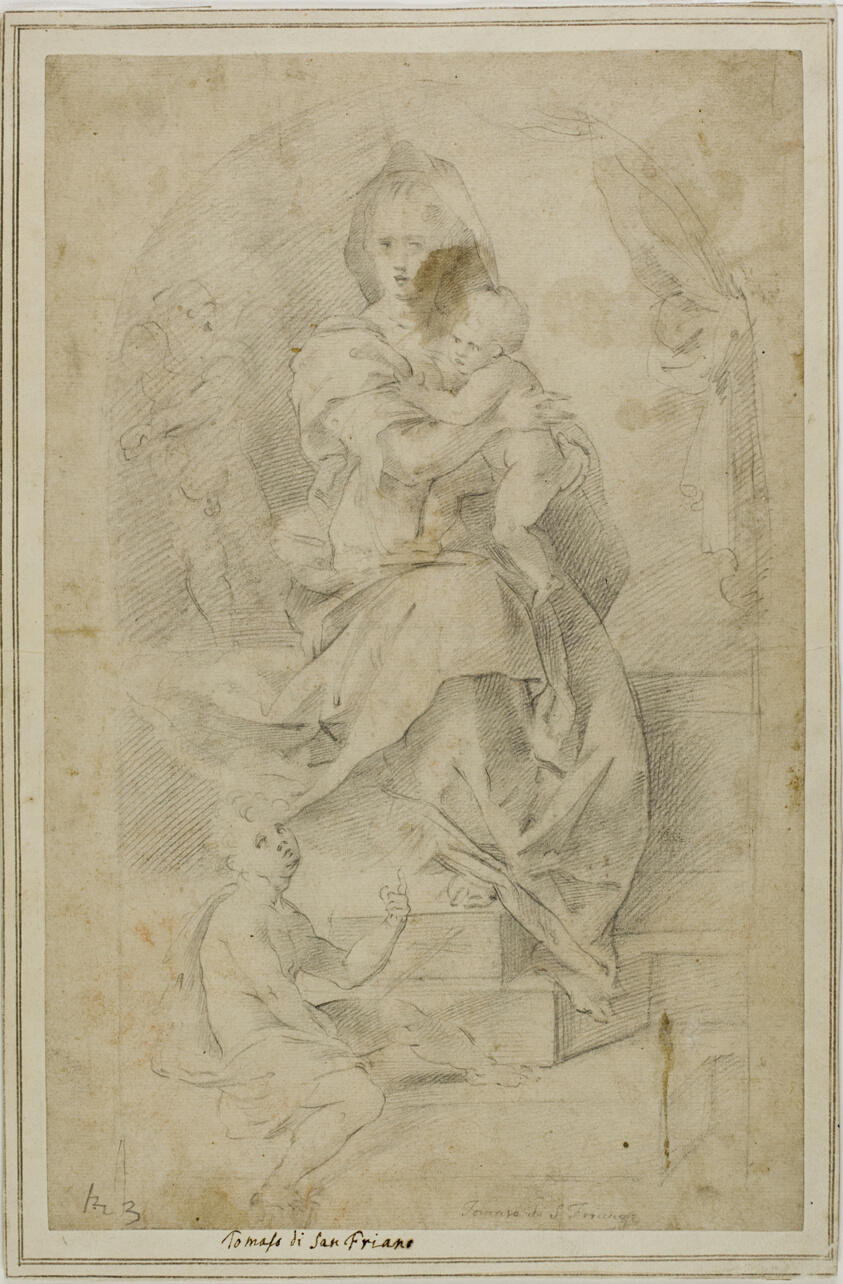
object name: Drawing and Watercolor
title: Madonna and Child with the Infant Saint John the Baptist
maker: Tommaso Manzuoli, called Maso da San Friano, after; Italian, 1531-1571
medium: Black chalk on cream laid paper, laid down on ivory laid card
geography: Italy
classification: chalk; drawings (visual works); prints and drawing